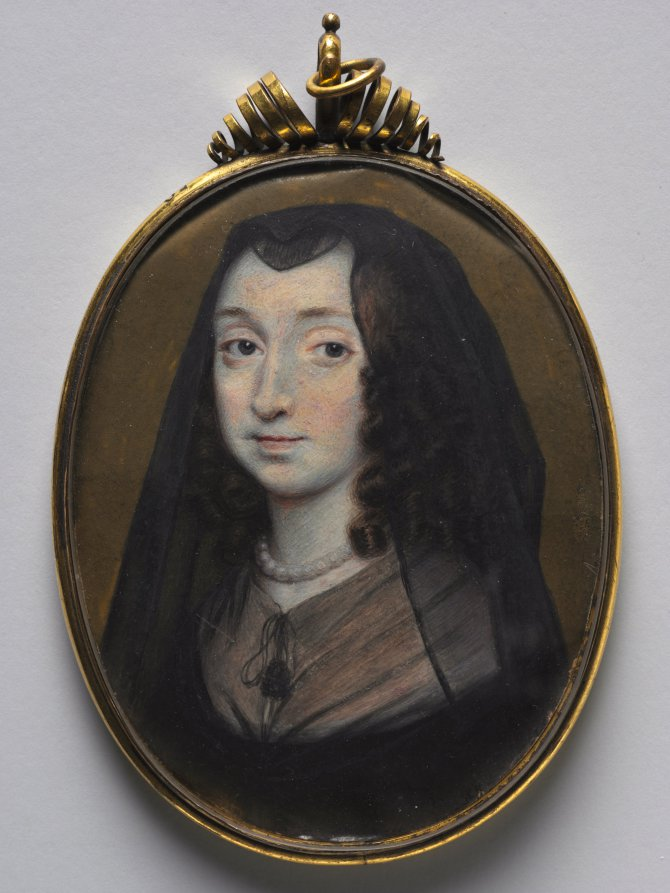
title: Portrait of Elizabeth Morrison, Lady Capell of Hadham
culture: England, 17th century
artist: Richard Gibson (British, c. 1615–1690)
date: c. 1650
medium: watercolor on vellum in a silver gilt frame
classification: Portrait Miniature